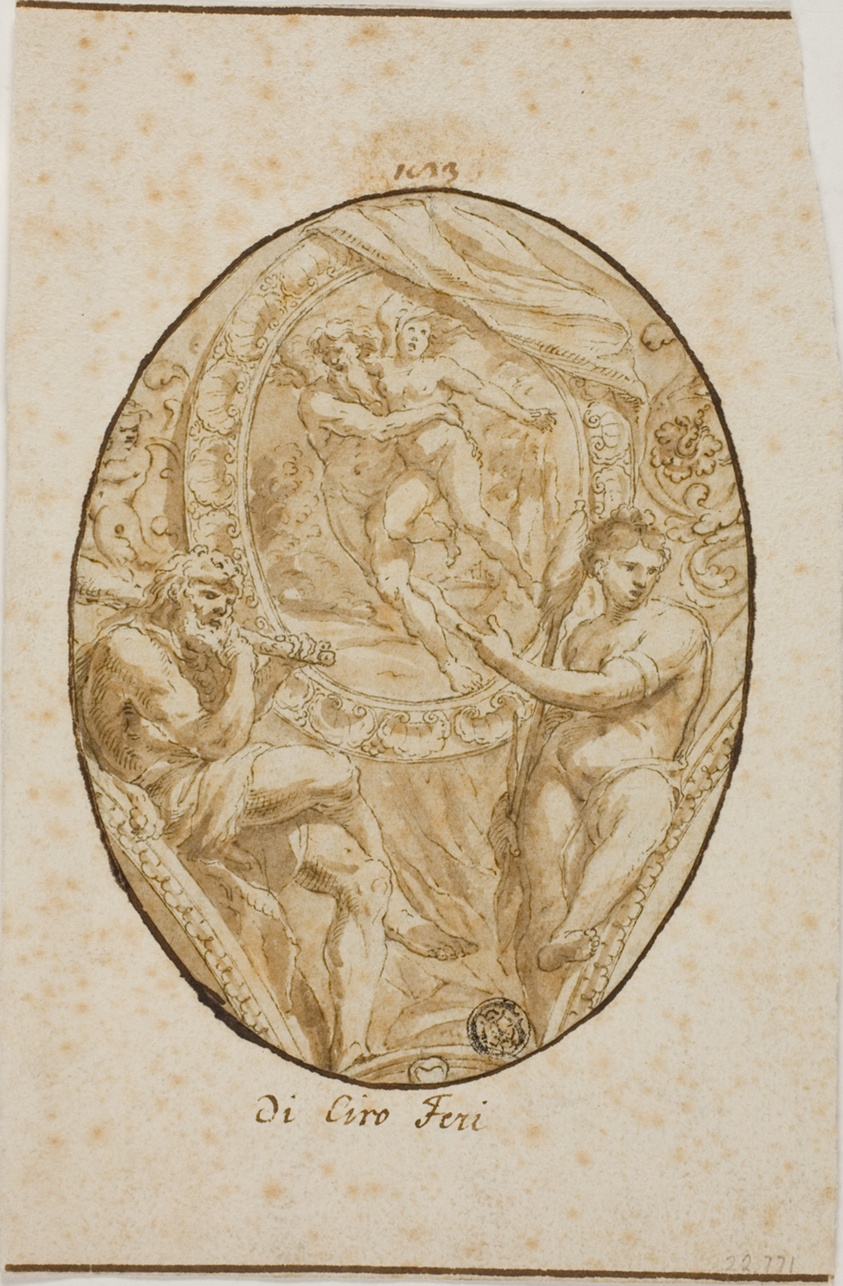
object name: Drawing and Watercolor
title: Spandrel with Rape of Orytheia Flanked by Hercules and Omphale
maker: Possibly after Ciro Ferri; Italian, 1634-1689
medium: Pen and brown ink, with brush and brown wash, over traces of black chalk, on ivory laid paper, laid down on ivory laid paper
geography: Italy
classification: ink or chalk wash; drawings (visual works); prints and drawing